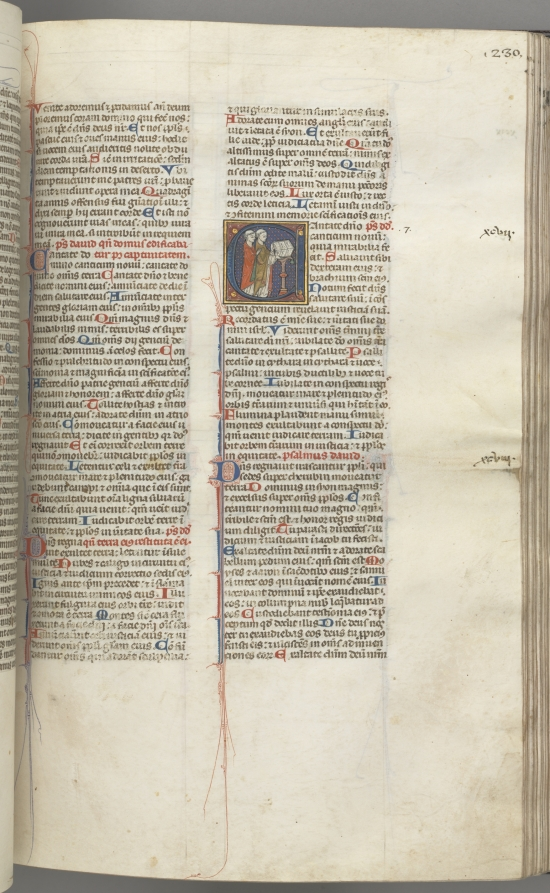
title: Fol. 230r, Psalm 97, historiated initial C, two clerics singing at a lectern.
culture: Southern France, Toulouse(?), 13th century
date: c. 1275–1300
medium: ink, tempera and gold on vellum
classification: Bound Volume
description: Biblical manuscripts were highly prized and important possessions of churches, monasteries, cathedral schools, and universities throughout medieval Europe. The biblical texts were known as the vulgate, the translations made by Saint Jerome in the fourth century from Hebrew and Greek into Latin, which became the definitive and official Latin version of the Roman Church. In the 13th century, the bible was, for the first time, produced as a single volume with an officially sanctioned sequence to its books and chapters as illustrated by this example. The very extensive decoration of this bible is arranged hierarchically to indicate the relative importance of the various texts so that full or almost full-page initials mark the openings of the first prologue, Genesis, and the first Gospel; historiated initials mark the beginning of each book and illuminated initials mark the Prologues.